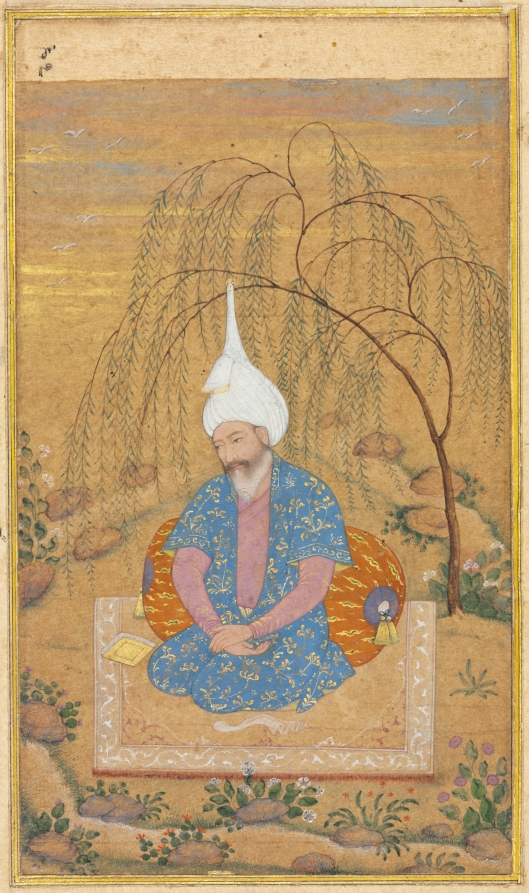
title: Shah Tahmasp I (1514–1576) Seated in a Landscape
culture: Iran, Qazvin, Safavid period (1501-1722)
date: c. 1575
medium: opaque watercolor and gold on paper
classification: Manuscript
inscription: Inscription in English, undated: "Portrait of Tahmasp I, Shāh Safavi, King of Persia (b. 1514: d. 1576). Reigned, 1524–1576. The celebrated ally and friend of the Mogul Emperor Humayun. Persian; about 1575."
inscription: [square black seal]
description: Shah Tahmasp I, the second ruler of Iran’s Safavid dynasty, is shown kneeling pensively on a carpet under a willow on the banks of a stream, a book at his side. The luxurious fabrics of his robe and his bolster pillow, with sprigs and cloud motifs in gold, indicate his wealth and privilege. Even the fine white cloth of his turban is edged in gold, topped by a small cluster of jewels.